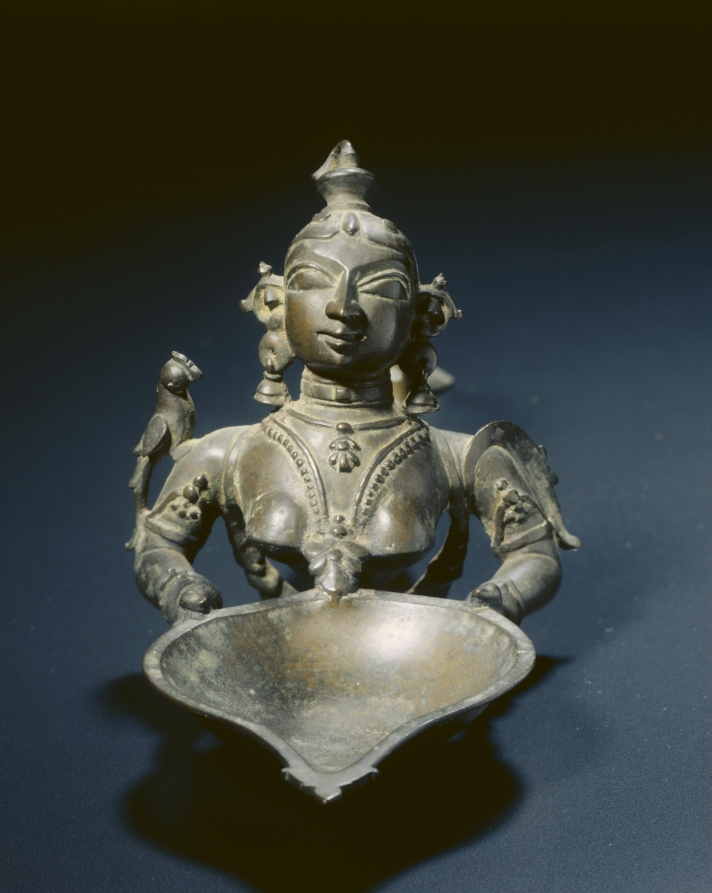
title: Votive Lamp (Deepa Lakshmi)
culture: South India, Chingleput district (Madras), 18th-19th Century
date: 1700s-1800s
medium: bronze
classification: Sculpture